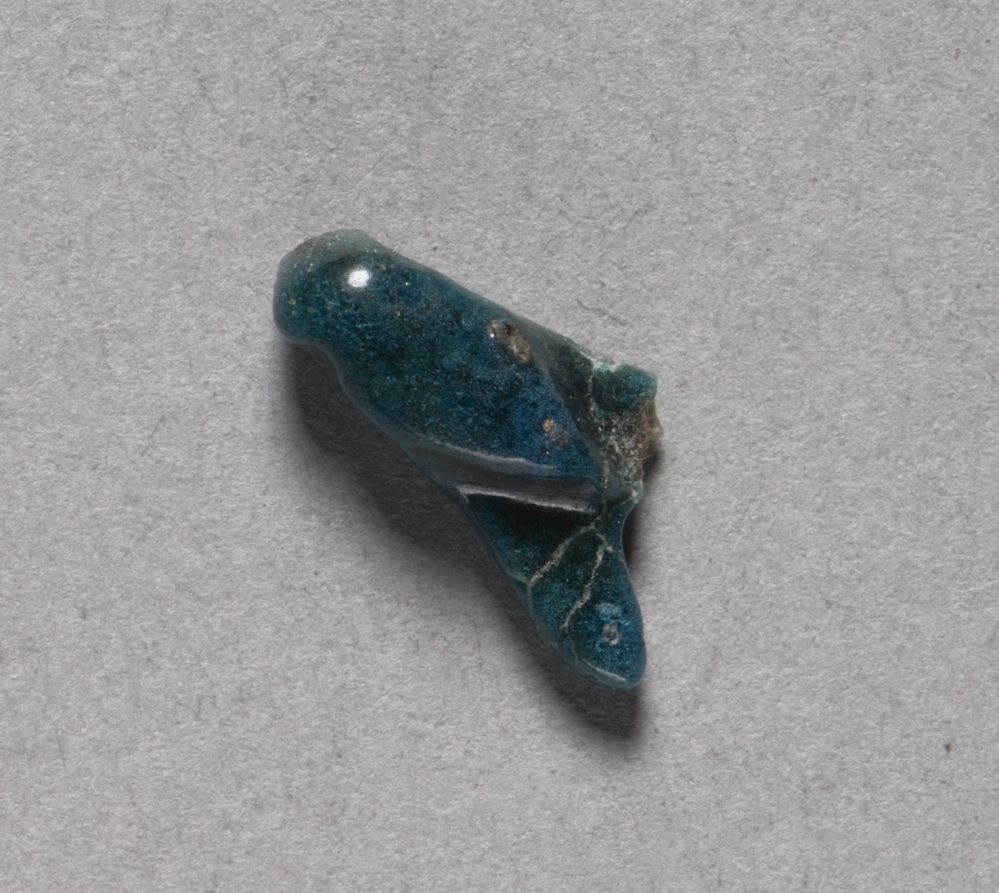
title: Fly Amulet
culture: Egypt, Middle Kingdom (2040–1648 BCE)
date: 2040–1648 BCE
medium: deep turquoise green faience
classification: Amulets